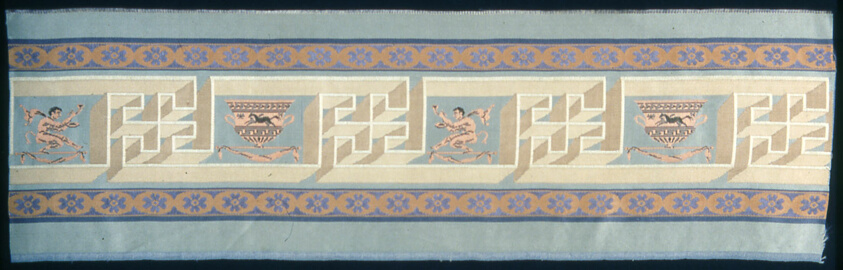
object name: Textile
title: Border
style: directoire, european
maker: France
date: Directoire period, 1790/99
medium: Silk, warp-float faced satin weave with plain interlacings of secondary binding warps, supplementary brocading wefts and self-patterning ground wefts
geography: France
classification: textile; weaving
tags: Greek, cupids